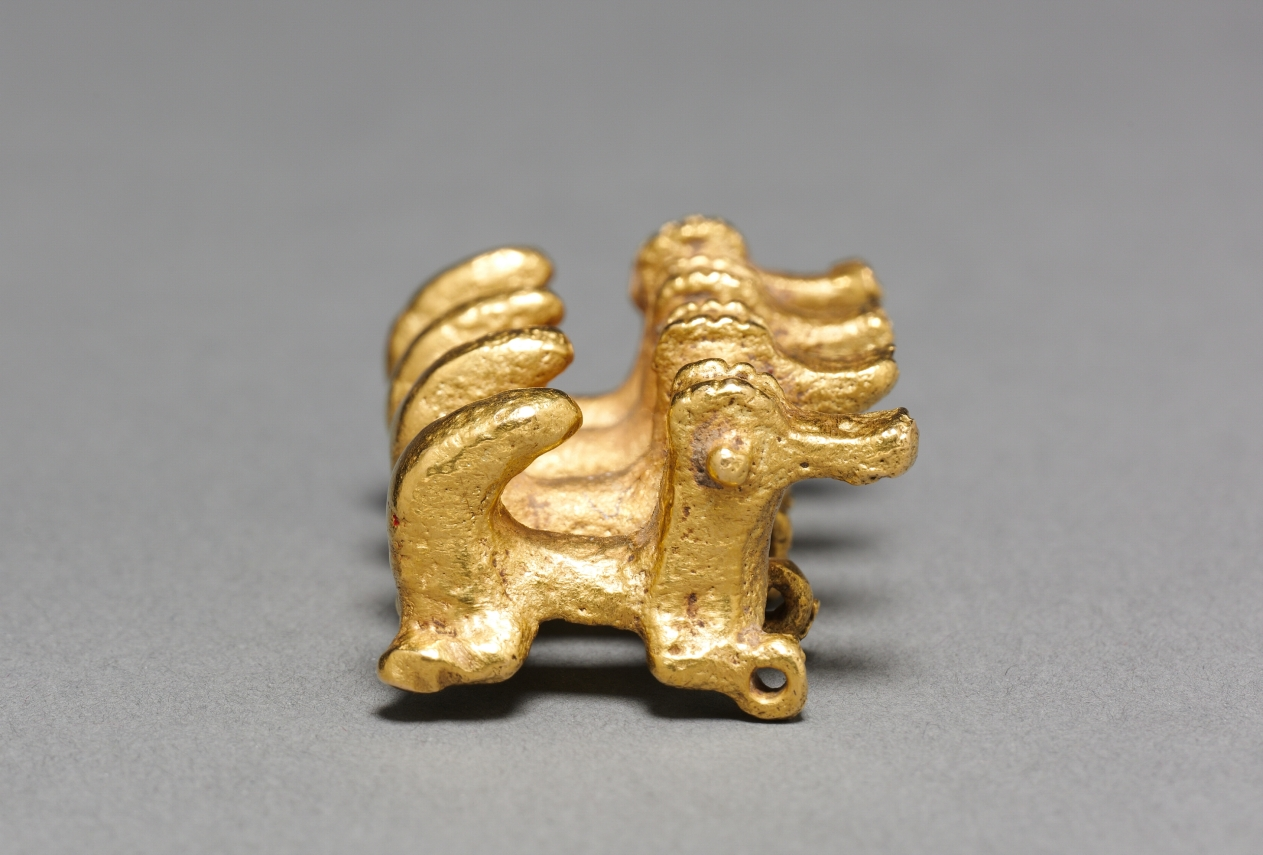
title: Curly-Tailed Animal Pendant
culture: Panama, Initial style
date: 100–800 CE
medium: gold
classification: Metalwork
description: A favored Initial-style subject is a charming animal whose curly tail -- its most impressive feature -- may derive from a monkey’s. Its other traits vary considerably, causing it to be identified as everything from a dog to a duck. Initial-style gold ornaments represent Panama’s oldest metalwork. Since metal technologies appeared suddenly and fully developed in Panama, it is likely that they were introduced from the outside, probably from Colombia to the south.